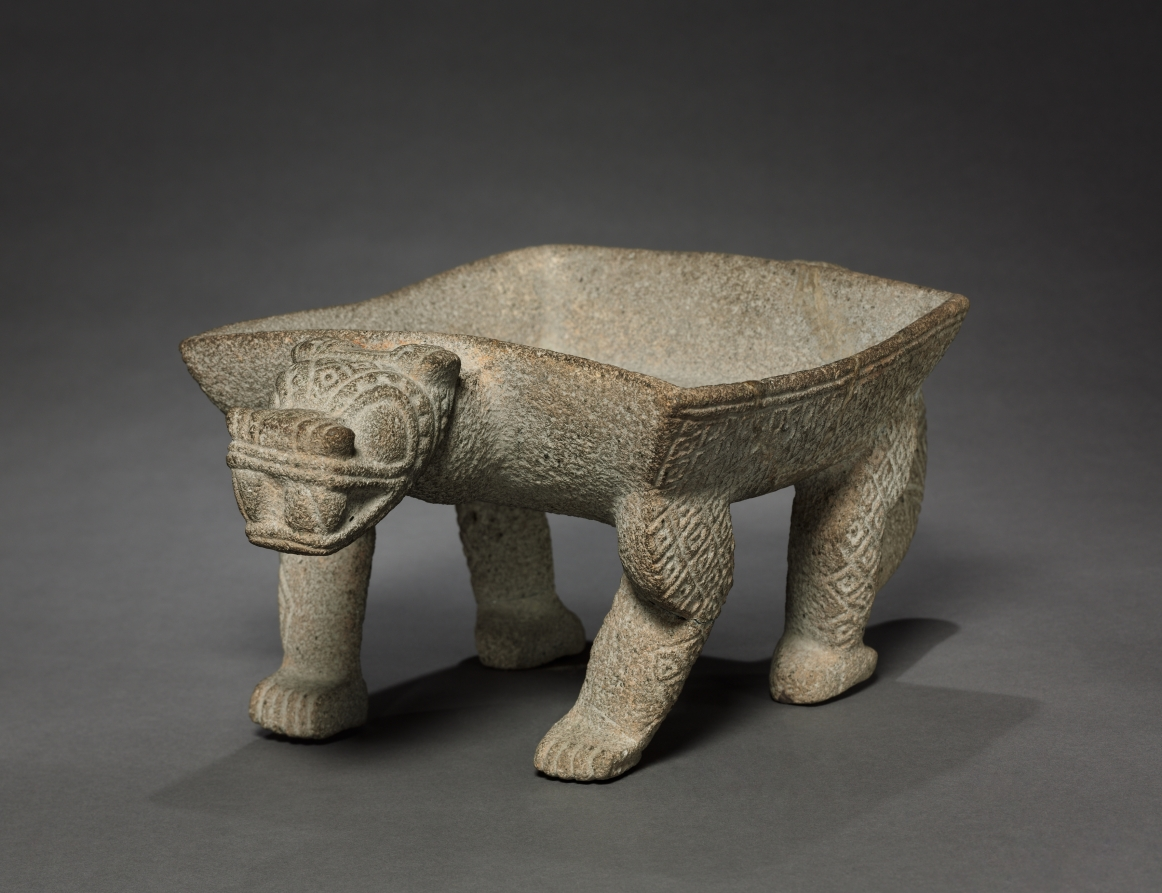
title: Jaguar Grinding Stone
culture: Costa Rica, Atlantic Watershed region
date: c. 1000–1550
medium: stone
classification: Sculpture